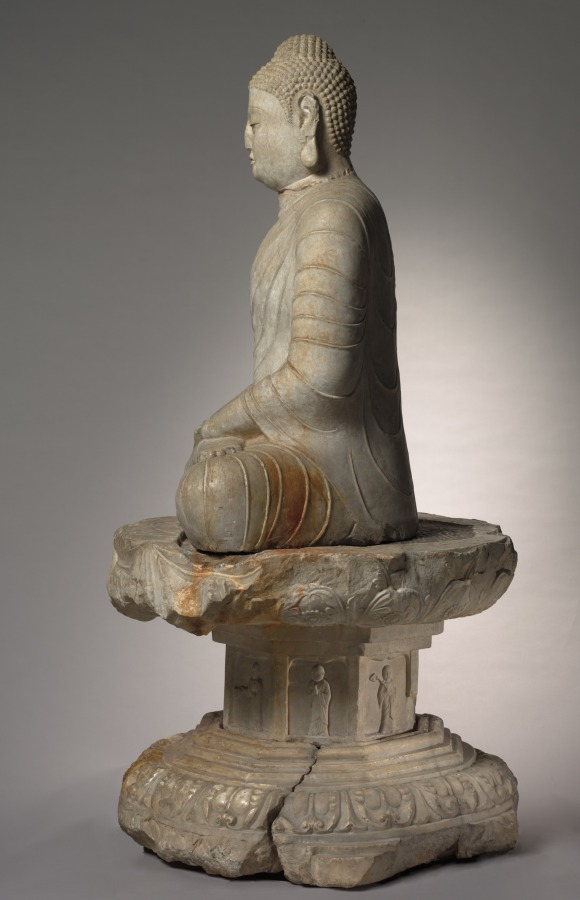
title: Seated Amitayus Buddha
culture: China, Northern Qi dynasty (550-577)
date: c. 570s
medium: marble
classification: Sculpture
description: Amitayus, the Buddha of Infinite Life, is seated in meditation on a double lotus pedestal. The pedestal was not made with the statue but the combination is faithful to the original artistic conception. The statue is an extremely rare example of a major type of Northern Qi Buddhist sculpture. The heavy, massive front highlights the sense of monumentality and the spiritual essence of the Buddha. Today the sculpture is united with a pedestal that exhibits the rich, ornate style of early Tang sculpture. It was commissioned by the Duke of Liang, Fang Xuanling (578–648), for the blessing of his second son and daughter-in-law, the Tang imperial princess of Gaoyang. The iconography and inscription suggest that it originally went with a statue, now missing, of Shakyamuni, the historical Buddha, instead of Amitayus.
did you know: The stringlike folds of the Buddha's draperies emphasize his monumental, rigidly erect torso and tubular limbs.